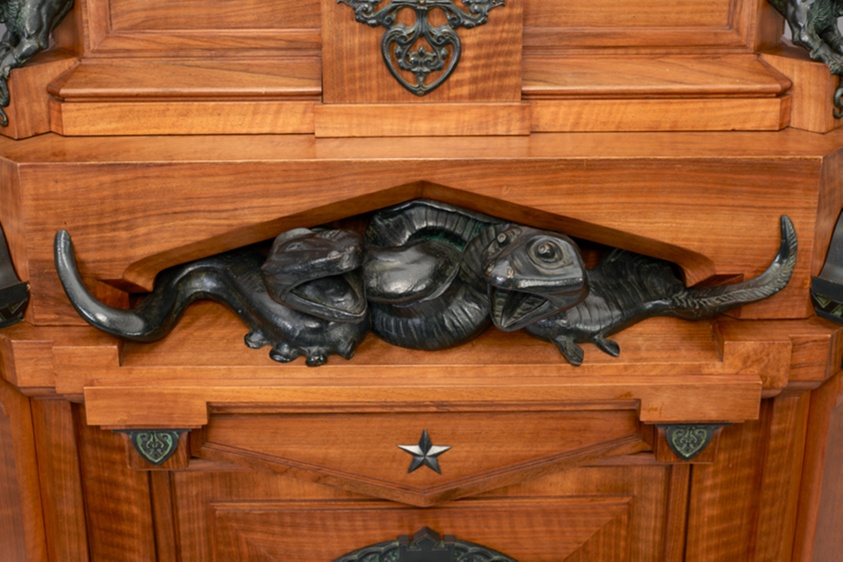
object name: Furniture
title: Cigar Cabinet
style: Neogothique, 19th century, gothic revival, merovingian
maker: Made by Charles-Guillaume Diehl (German, active in Paris, 1811–1885); Designed by Jean-Eugene Brandely (French, active 1867–1873); Bronzes modeled by Emmanuel Fremiet (French, 1824–1910); Paris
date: c. 1867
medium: Oak, cedar and walnut veneers, patinated bronze, and caning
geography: Paris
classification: furniture; humidor; european decorative arts; cabinet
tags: lizards, merovech, merovee, quatrefoil, smoking, cigars, tobacco